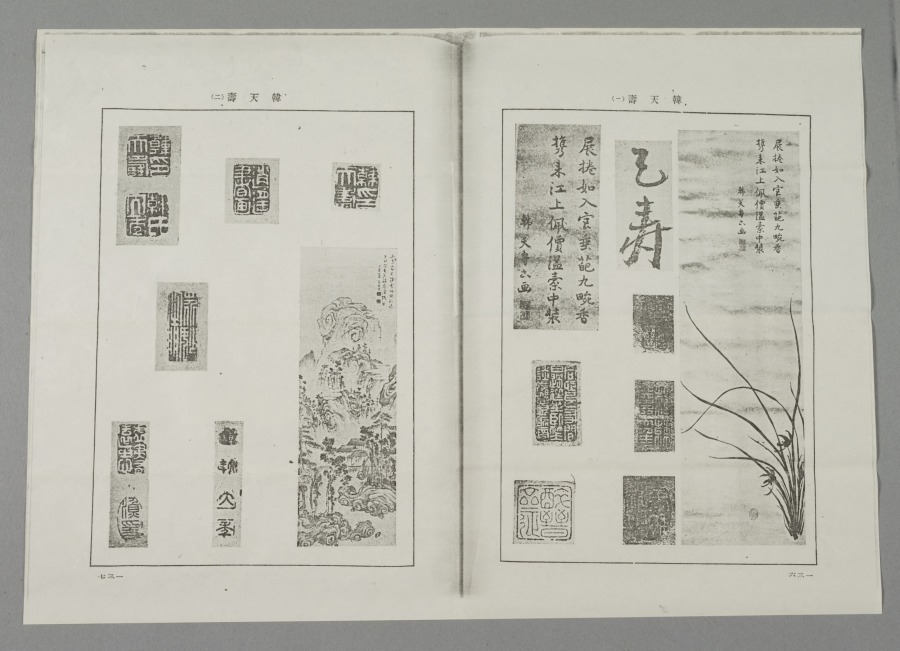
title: Landscape with Gentle Peaks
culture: Japan, Edo period (1615–1868)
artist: Kan Tenju (Japanese, 1727–1795)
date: 1767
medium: hanging scroll; ink and light color on paper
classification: Painting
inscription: 雨過嵐光煙／雲陽樹影諫／夕陽独在左／？卷讀残書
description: A figure sits in a retreat tucked into the mountains near a waterfall. The painter, Kan Tenju, was best known as a calligrapher and seal carver. Of Korean heritage, he was a patron of artist Ike Taiga (池大雅) (1723–1776), and a cousin of Taiga’s student Aoki Shukuya (青木 夙夜) (died 1802). His Chinese-style poem reads as follows: Smoky mist in the mountain reflects light after the rain, Sunlight passes through the clouds to cast shadows of the trees, Alone in the sunset, I read a well-worn book.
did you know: This painting combines image and calligraphy, connected by skillful brushwork.